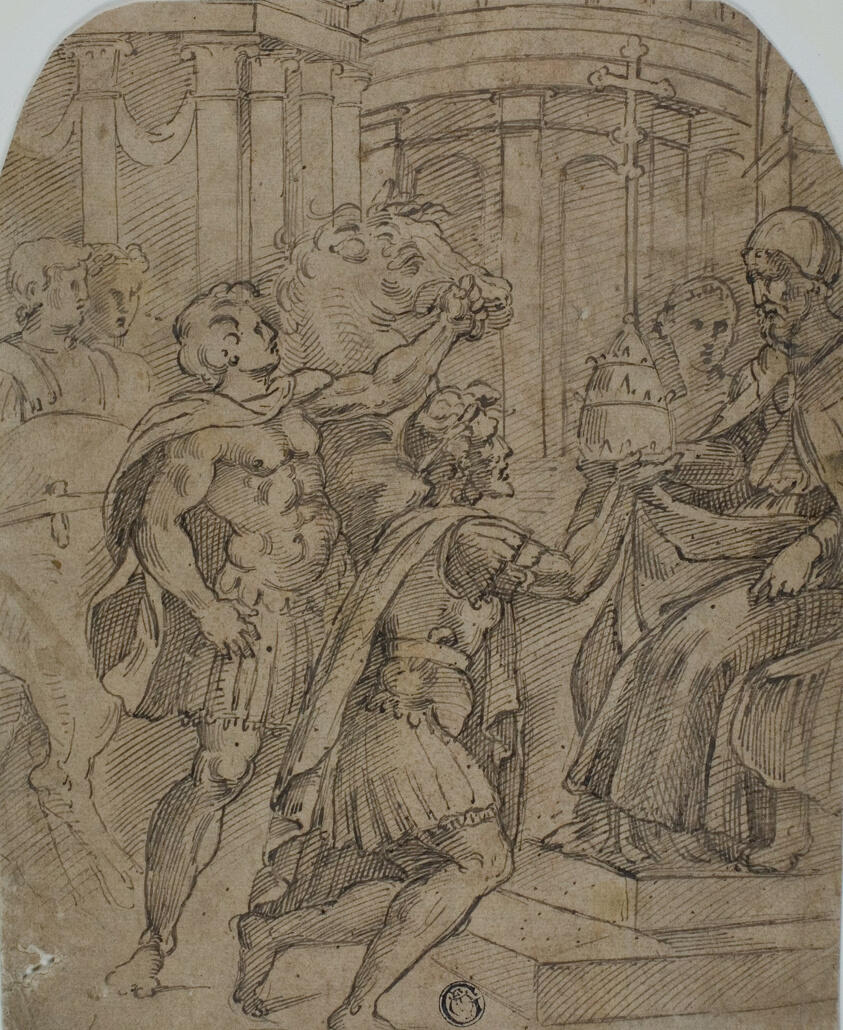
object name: Drawing and Watercolor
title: Study for the Emperor Constantine Offering the Tiara to Pope Sylvester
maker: After Raffaello Sanzio, called Raphael; Italian, 1483-1520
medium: Pen and brown ink on tan laid paper, laid down on cream laid paper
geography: Italy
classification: pen and ink drawings; drawings (visual works); prints and drawing